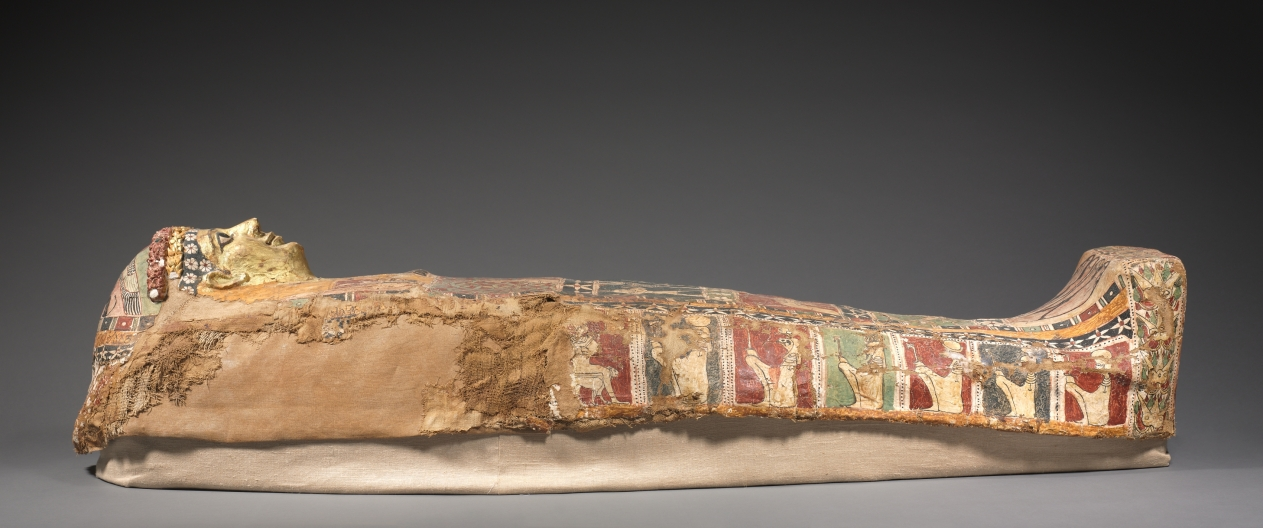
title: Cartonnage Mummy Case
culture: Egypt, Greco-Roman period (332 BCE–395 CE), Ptolemaic dynasty (305–30 BCE)–Roman empire (30 BCE–395 CE)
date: c. 50 BCE–50 CE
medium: cartonnage, painted and gilded, with glass inlays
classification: Funerary Equipment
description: This mummy case is made of cartonnage, a material similar to papier-mâché, but using layers of linen rather than paper. Cartonnage mummy cases such as these are contemporary with funerary portraits painted on wood or linen, although they present a very different appearance. The face, modeled in plaster, is bland and idealized, although the effect of the gilding and glass inlays is quite dazzling. The body is painted with traditional, age-old funerary motifs: the god Osiris, seated and mummiform; the fetish of Abydos, holy city of Osiris, flanked by standing deities (Thoth and Shu); a Horus falcon with outspread wings, and the bark of Sokar. Below these are the sandaled feet of the deceased. On the sides are rows of seated deities. On the top of the head are a winged scarab beetle flanked by Anubis jackals. On the foot are painted the soles of the deceased’s sandals, flanked by scorpions for protection.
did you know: This coffin is smaller and later in date than the other coffins in this gallery. It is made of cartonnage, which used layers of linen to create a material similar to papier-mâché. The painted portrait head displays the influence of Roman portraiture at this time and incorporates both gilding and glass inlays. Despite the fragile materials, this mummy case survived due to the very dry desert climate in which it was found.